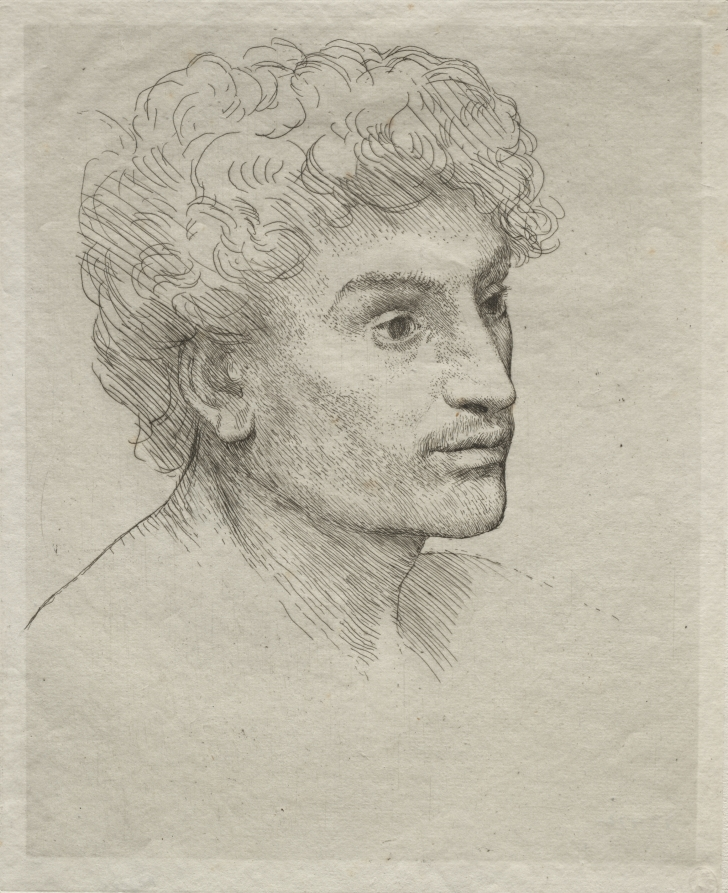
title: Head of a Young Man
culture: France, 19th century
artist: Alphonse Legros (French, 1837–1911)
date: c. 1857–1911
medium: etching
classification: Print